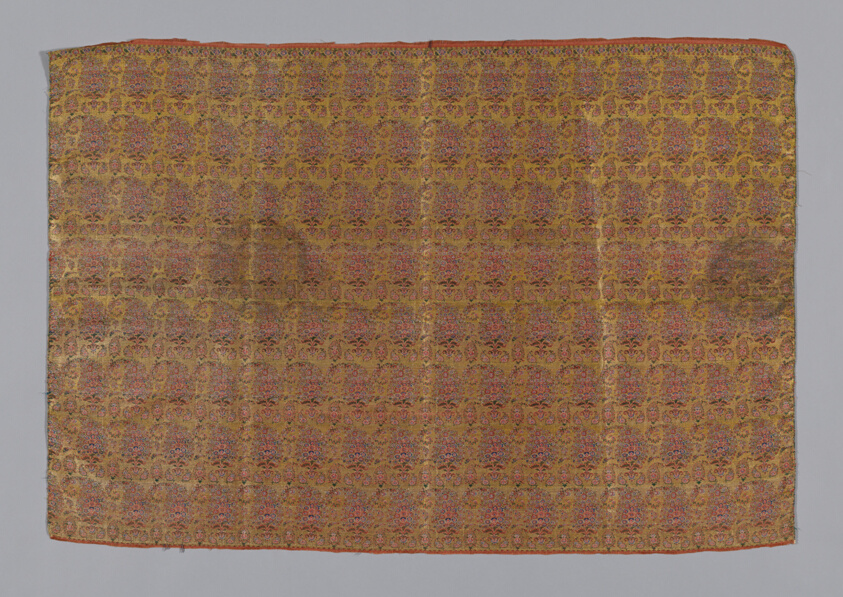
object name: Textile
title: Panel (Dress Fabric)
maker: Iran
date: 1775/1825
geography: Iran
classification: textile; weaving